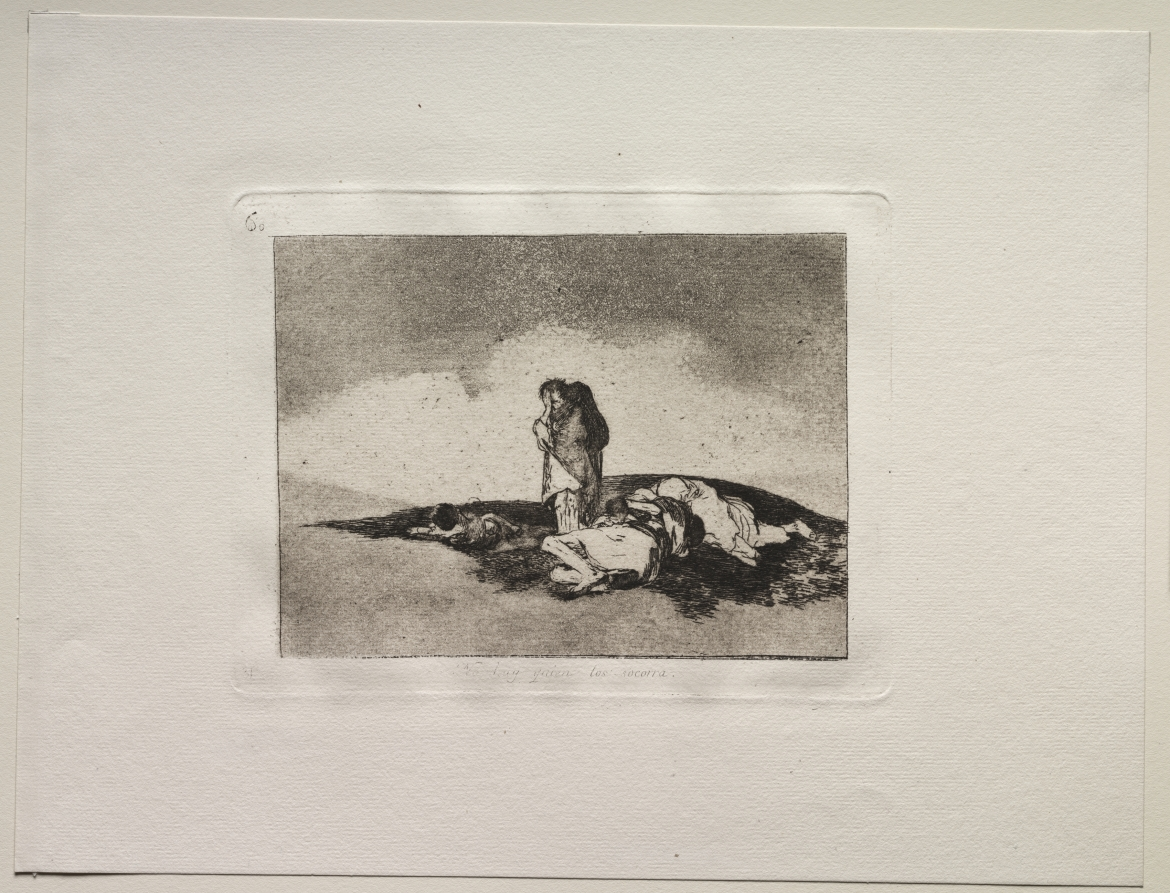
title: The Horrors of War: There is No One to Help Them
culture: Spain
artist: Francisco de Goya (Spanish, 1746–1828)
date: c. 1810–20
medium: etching and aquatint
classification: Print